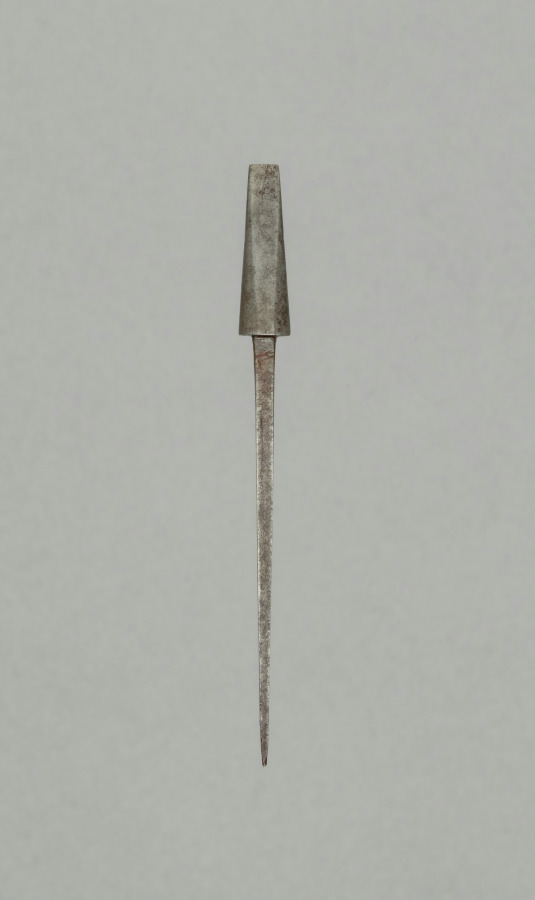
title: Arrow Point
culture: Japan, Edo period (1615–1868)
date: 1700s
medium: steel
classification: Arms and Armor